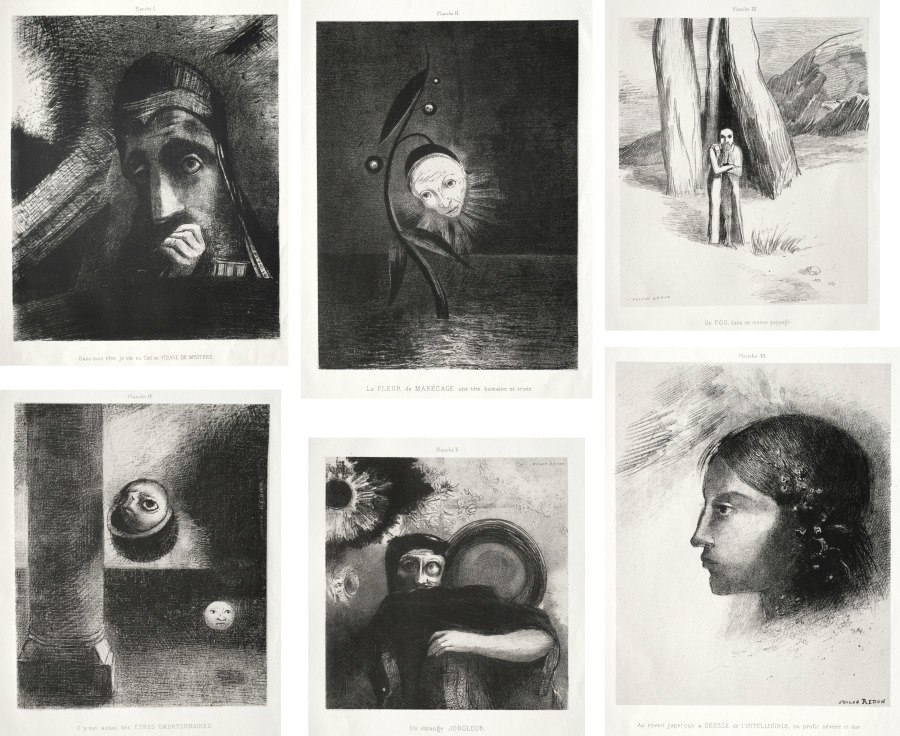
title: Homage to Goya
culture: France, 19th century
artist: Odilon Redon (French, 1840–1916)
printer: Lemercier & Cie.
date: 1885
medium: six lithographs on China paper laid on wove paper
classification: Print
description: This series is one of many that Odilon Redon created throughout his career. Nearly two-thirds of his lithographs took the form of portfolios—prints connected conceptually by a theme or narrative and physically by a folder or binding. Such works were often dispersed over time, but Cleveland was fortunate to acquire several complete sets with their original covers during the 1920s. Dating from Redon’s early experimentation with lithography, Homage to Goya was intended as a tribute to 18th-century Spanish master Francisco de Goya, whose interest in dreams and the subconscious influenced Redon. The six seemingly unrelated images celebrate Goya’s ambiguity and collectively suggest the introspection and isolation of artistic practice.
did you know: This portfolio was published in an edition of 50, one of which Redon sent to poet Stéphane Mallarmé soon after Redon became a frequent participant in a literary salon held regularly at Mallarmé's home.